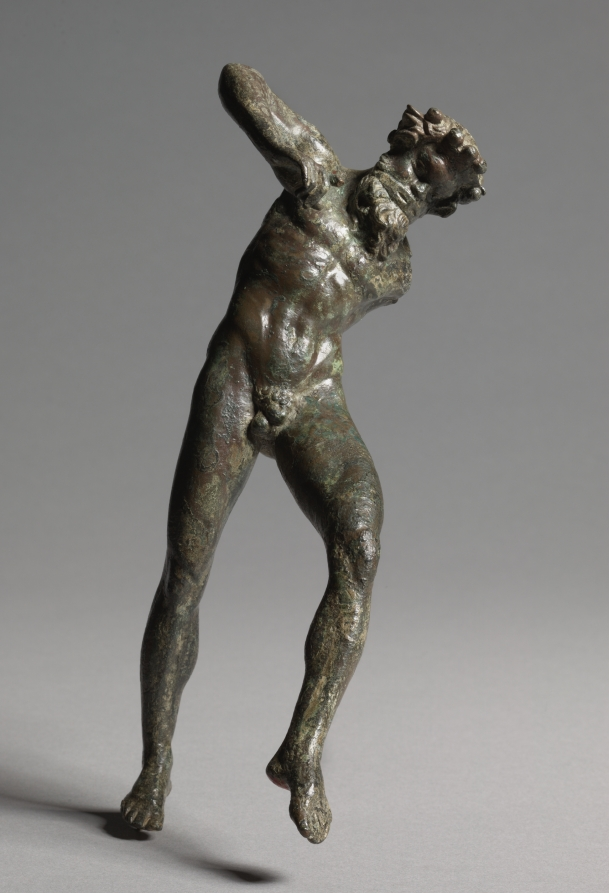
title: Piping and Dancing Satyr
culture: Greece, Alexandria(?)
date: 300–100 BCE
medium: bronze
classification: Sculpture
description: With its long limbs and unbalanced pose, this bronze statuette captures a male figure in the middle of a dance. His pointed ears, snub nose, and berry crown mark him as a satyr, a part-man, part-horse follower of Dionysos, the Greek god of wine and revelry. He probably once held auloi (musical pipes), to judge from the placement and shape of his right hand, plus the strap around his mouth; his left arm is now missing. Composed of multiple cast pieces joined together, the dynamic pose of this statuette shows the Hellenistic interest in movement and the body.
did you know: The special strap around the satyr’s mouth to help him play the pipes is called a phorbeia.